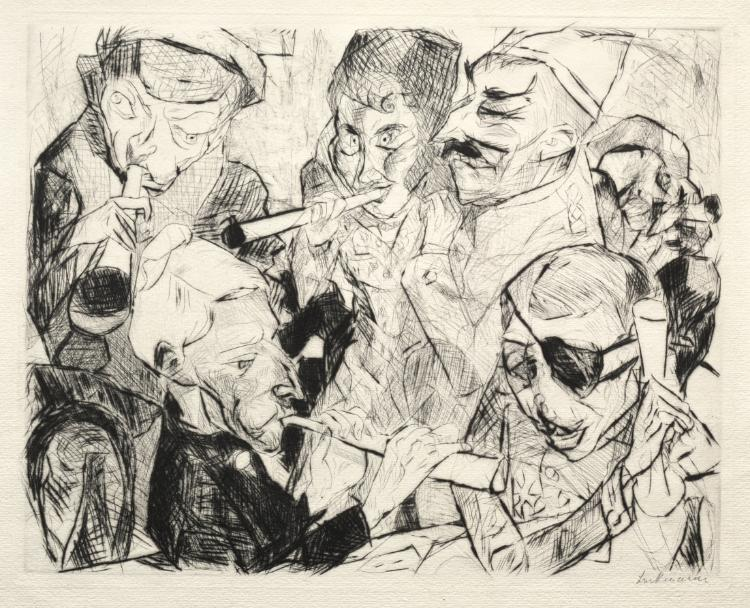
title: Happy New Year 1917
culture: Germany, 20th century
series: The Faces (Die Gesichter)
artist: Max Beckmann (German, 1884–1950)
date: 1917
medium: drypoint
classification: Print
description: This closely packed image portrays a mix of people at a holiday party. A skeleton-like war veteran with a patched eye is just one of several inebriated patrons whose celebration of a new year, Beckmann implies, is pure folly. The artist often worked in drypoint, a method of directly scratching a plate to create an image that, when inked, retains a velvety burr around the lines. The technique allowed him to work spontaneously, similar to sketching with a pen on paper.